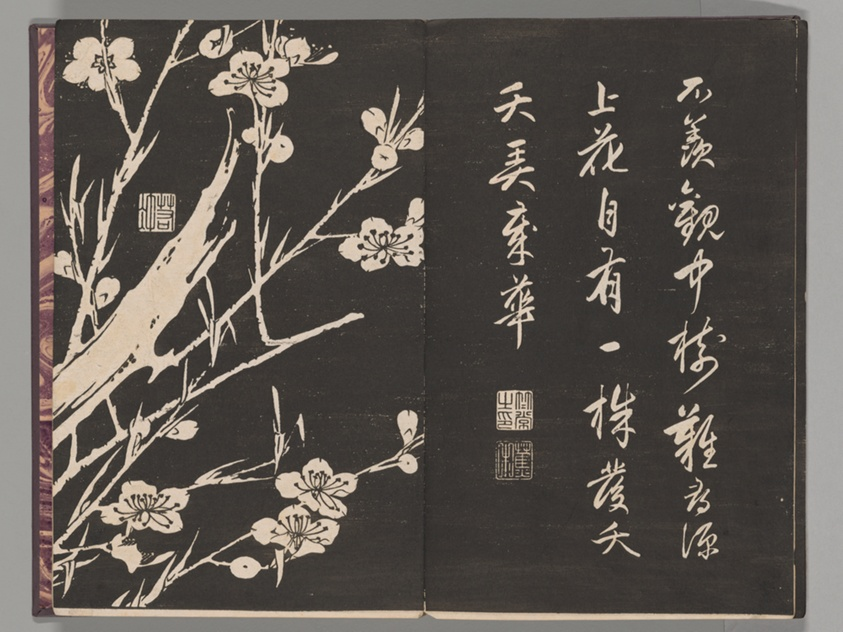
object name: Book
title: Soken sekisatsu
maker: Ito Jakuchu (Japanese, 1716-1800)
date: 1767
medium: Woodblock printed book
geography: Japan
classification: book